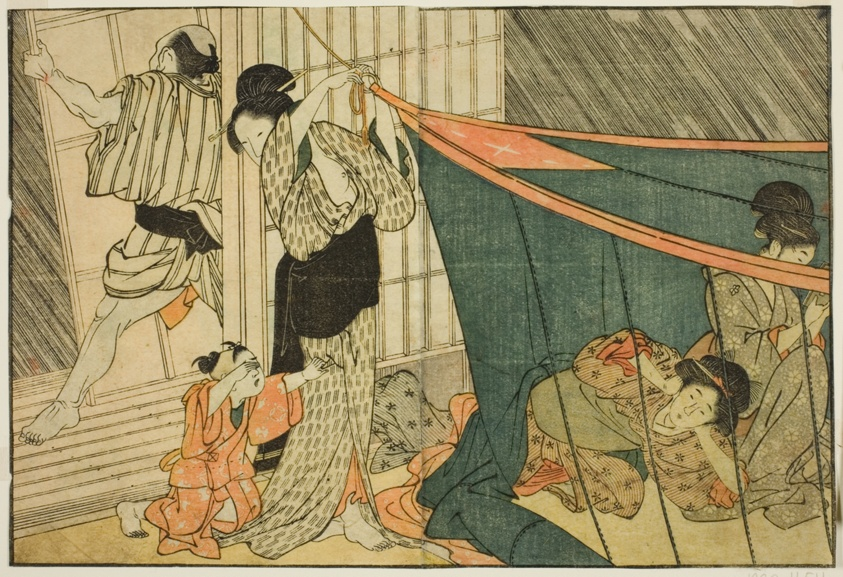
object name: Print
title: Women Inside a Mosquito Net During a Thunderstorm, from the illustrated book "Picture Book: Flowers of the Four Seasons (Ehon shiki no hana)," vol. 1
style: Japanese (culture or style)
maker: Kitagawa Utamaro 喜多川 歌麿; Japanese, 1753 (?)-1806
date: New Year, 1801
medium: Color woodblock print; double-page illustration from book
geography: Japan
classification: woodblock print; print; asian art